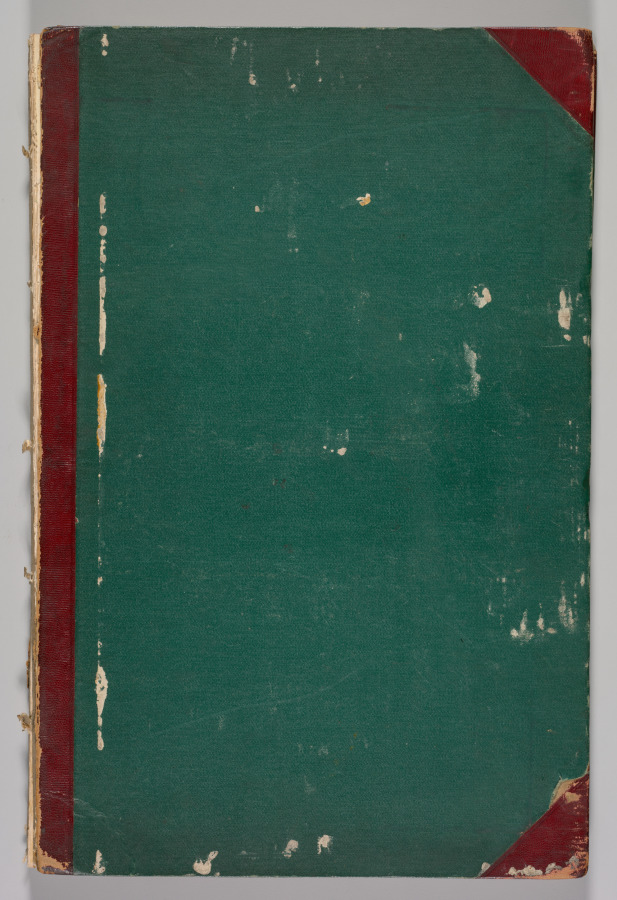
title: Liber Studiorum; A Series of Sketches and Studies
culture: England, 19th century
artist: John Sell Cotman (British, 1782–1842)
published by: Henry G. Bohn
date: 1838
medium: One bound volume containing 48 plates; softground etchings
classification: Bound Volume